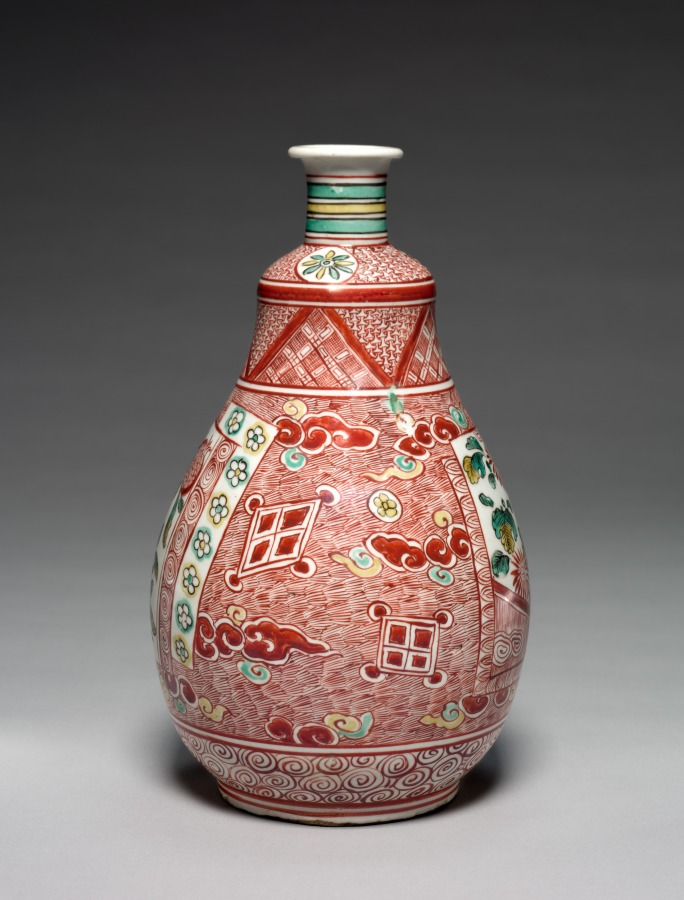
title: Tea Whisk-Shaped Sake Bottle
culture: Japan, Edo period (1615–1868)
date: 1660s–early 1670s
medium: Porcelain with overglaze enamel (Hizen ware, early iro-e)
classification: Ceramic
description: This sake bottle resembles a whisk used in preparing powdered green tea, with the handle at the top and the body of the brush flaring out below. Its bold design is anchored by images of chrysanthemums and pomegranates set in panels against a ground of red hatching with tricolored clouds. Additional patterns of swirls, stripes, flowers, and other forms make the piece dazzling.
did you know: This bottle is for sake, or fermented rice wine, Japan's most famous variety of local alcohol.